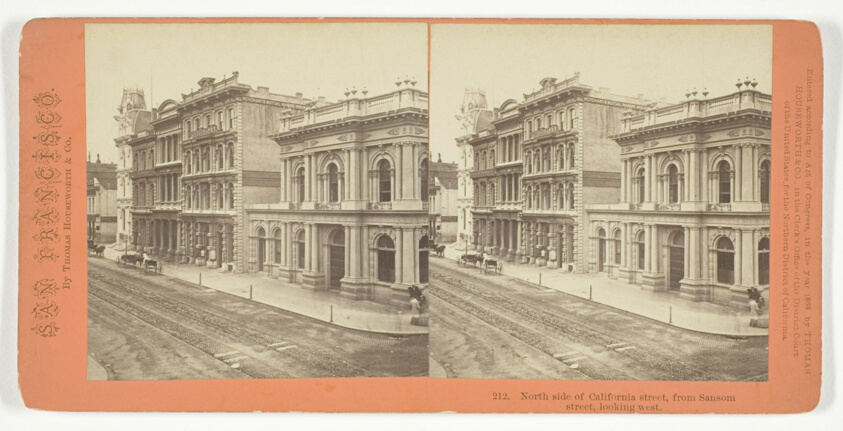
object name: Photograph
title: North side of California street, from Sansom street, looking west No. 212 from the series "San Francisco"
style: 19th century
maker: Thomas Houseworth & Co.; American, 1828–1915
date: 1867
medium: Albumen print, stereo,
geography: San Francisco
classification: photography; photograph; albumen silver print; stereograph (albumen)